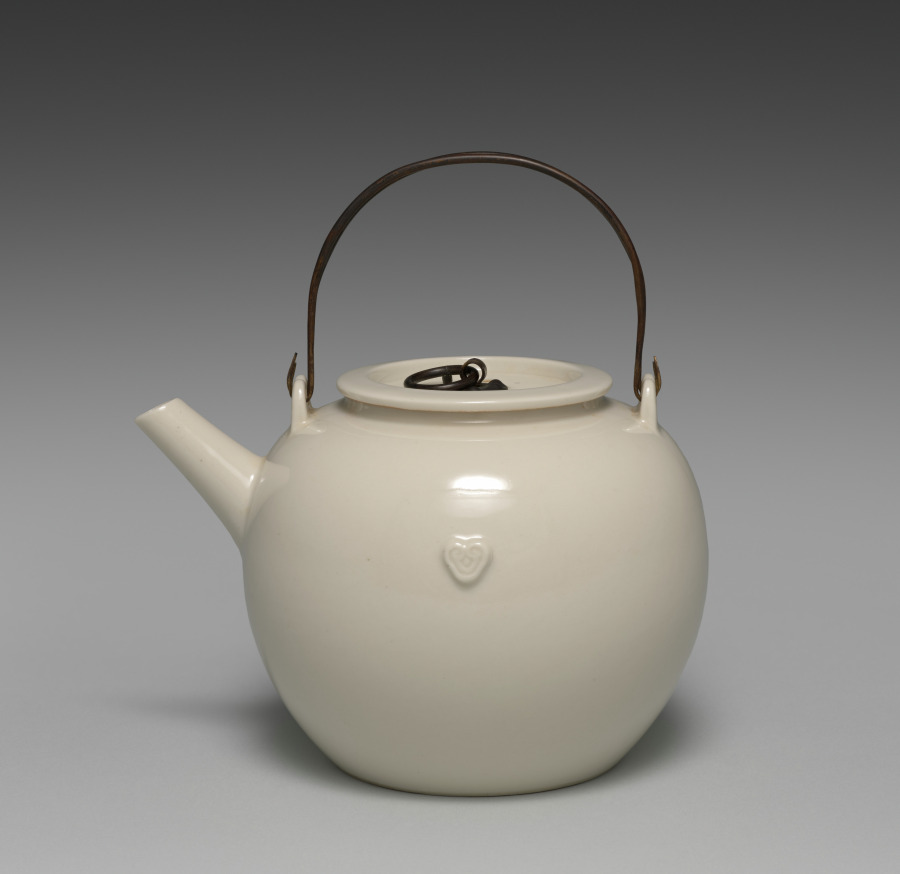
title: Teapot with Ruyi Motifs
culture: Japan, Meiji period (1868–1912)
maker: Seifū Yohei III (Japanese, 1851–1914)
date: 1893–1914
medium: Porcelain with molded design and iron handles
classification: Ceramic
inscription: The base of the pot has a “Seifu” seal.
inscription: Inscription on the box dated to 1960.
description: The simple, round form of this teapot is embellished with only a pair of nyoi staff-head motifs, one on each side. Two arched iron handles, parallel to each other, are hooked through holes in raised tabs at the front and back of the shoulders of the pot. The round lid is depressed so that an iron ring handle fastened with an iron clamp passing through the lid can lie flat inside the recessed area. The box is not original to the piece and has an inscription dated to 1960. The person who wrote it clearly admired Yohei III and his efforts to produce works that resembled Chinese ceramics. The inscription describes Yohei’s journey to perfecting these copies but misidentified the Chinese kiln whose wares were the basis for this particular work.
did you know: The base of the pot has a “Seifu” seal.